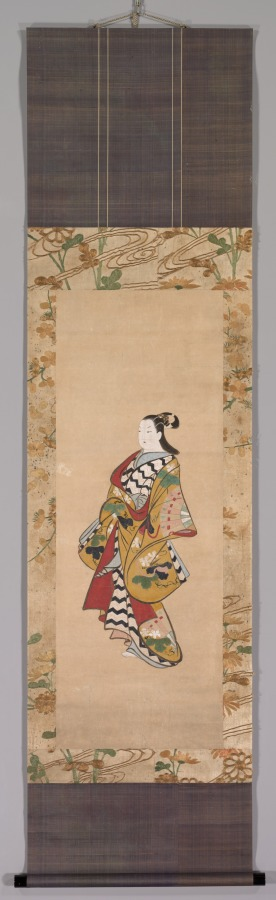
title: Courtesan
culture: Japan, Edo period (1615–1868)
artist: studio of Kaigetsudō Ando (Japanese, c. 1671–1743)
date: 1700s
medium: hanging scroll; ink and color paper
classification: Painting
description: Paintings of the courtesans who provided men with a sophisticated menu of appealing fashions, flattery, witty banter, music, dancing, and sexual services in the Yoshiwara district of the city of Edo (Tokyo) were the bread and butter of the Kaigetsudō studio, in whose style this work is painted. Their paintings emphasized bold, sweeping calligraphic ink lines in rendering the figures’ forms, along with high-contrast colors and patterns in their typically solitary subjects’ garments. Aside from the occasional prop or poem, the space around the dramatic figure was left entirely blank.